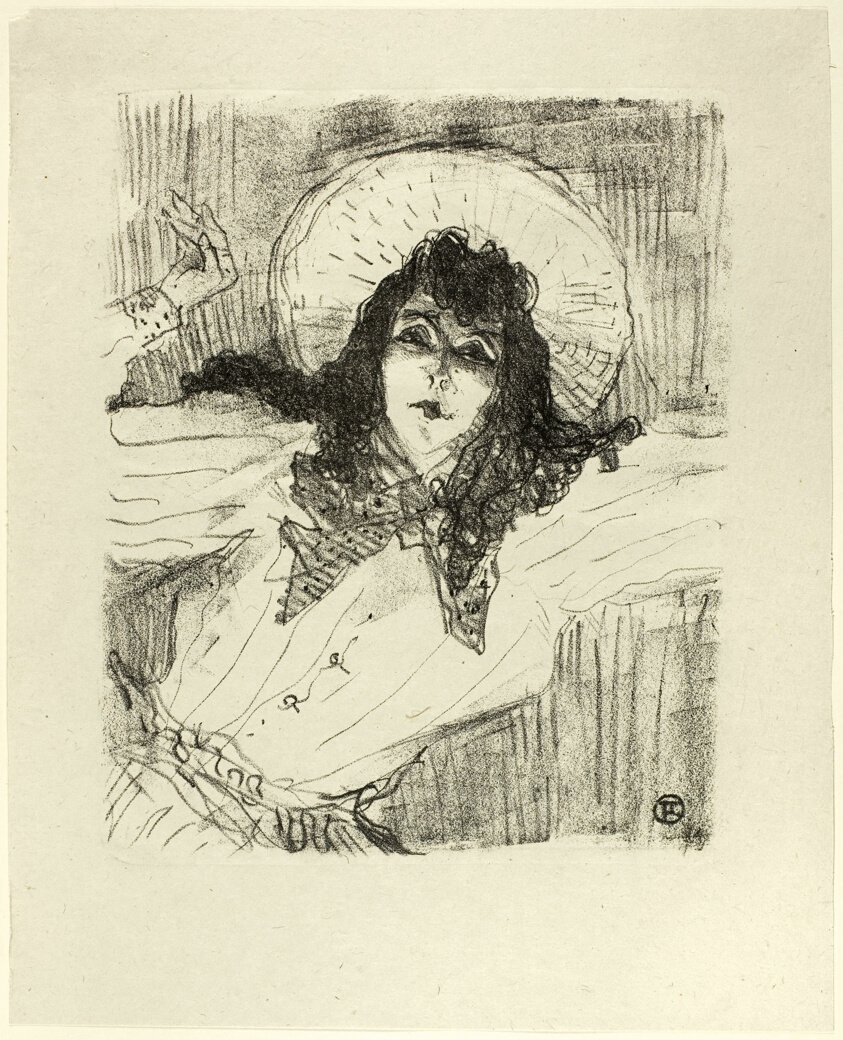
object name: Print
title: May Belfort, from Treize Lithographies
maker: Henri de Toulouse-Lautrec (French, 1864-1901)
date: 1898, published before 1906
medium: Lithograph on ivory laid paper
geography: France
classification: lithograph; print; prints and drawing